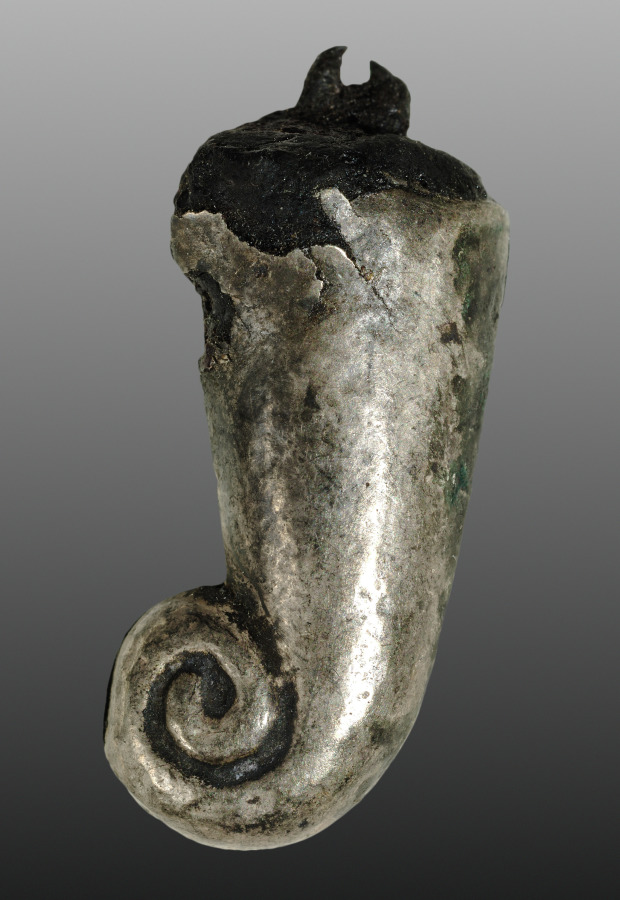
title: Sidelock (one of a pair)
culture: Egypt, Middle Kingdom (2040–1648 BCE), Dynasty 12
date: 1980–1801 BCE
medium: Electrum (?) over a clay-bulked resinous core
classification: Jewelry